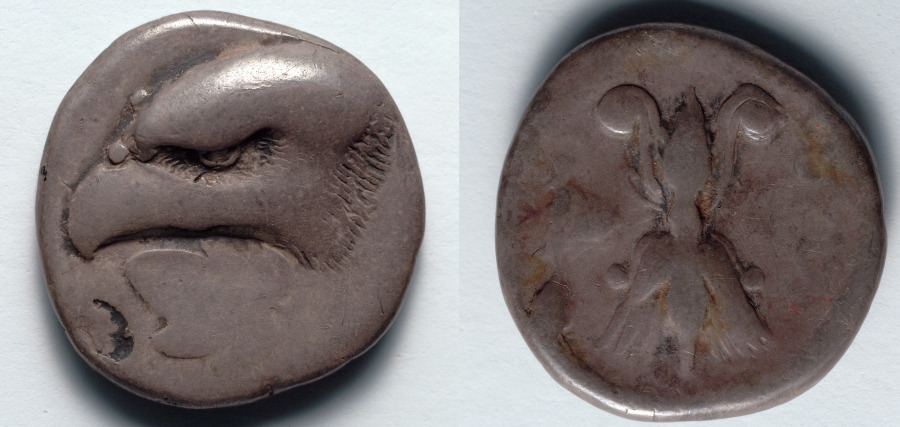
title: Stater: Head of Eagle (obverse); Thunderbolt (reverse)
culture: Greek, probably minted at Elis (Elis)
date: c. 400 BCE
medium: silver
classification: Coins